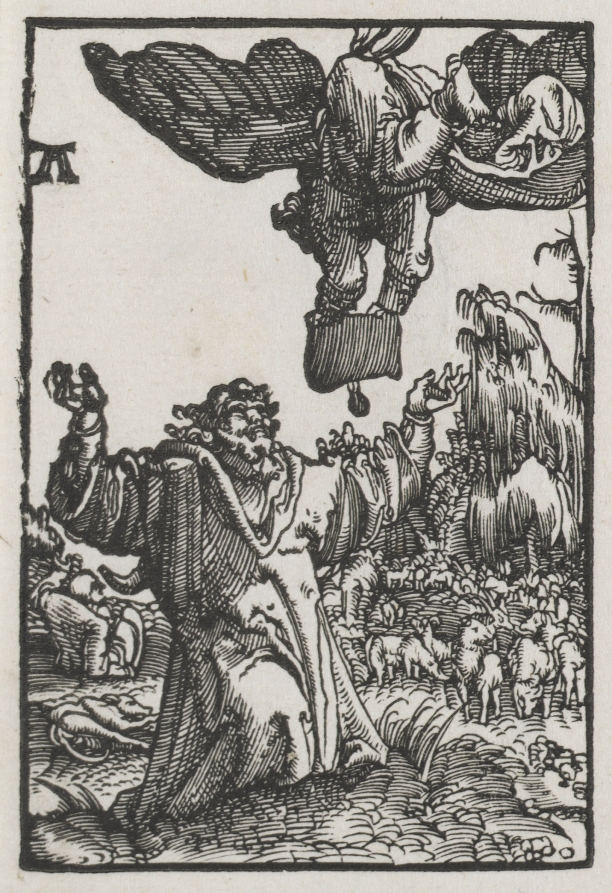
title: The Fall and Redemption of Man: The Message of the Angel to Joachim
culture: Germany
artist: Albrecht Altdorfer (German, c. 1480–1538)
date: 1515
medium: woodcut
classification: Print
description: These eight woodcuts come from a series of forty which illustrate the story of Christian redemption from original sin to the Last Judgement. Probably to maximize printing efficiency and quality, eight woodblocks were printed on each of five sheets of paper, but the subjects are not in the correct chronological order. Prior to sale, the sheets were cut into eight pieces. The sheets in the museum's set were only cut in half, preserving four prints per page. The numbers after the titles of the individual images indicate each scene's place within the narrative. By 1513, Altdorfer had already executed a number of small, finely detailed engravings. Because it is difficult to achieve the same degree of precision using woodcut, The Fall and Redemption of Man is a technical tour de force. Probably inspired by Albrecht Dürer's Small Passion (1511)-but almost double the size-the only contemporaneous comparable set of fine miniature woodcuts, Dance of Death, was designed by Hans Holbein in about 1526 (on view nearby).